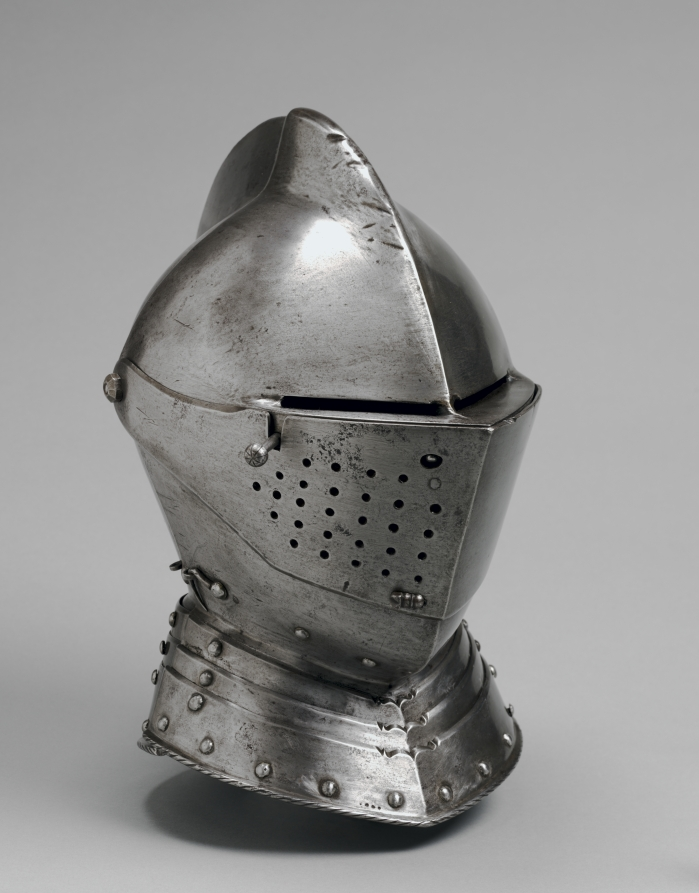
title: Helmet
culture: Germany, Saxony, 16th century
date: c. 1560–80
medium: steel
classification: Arms and Armor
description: This helmet was developed for the joust, a sporting combat of arms between two mounted contestants. This example shows the asymmetry of jousting armor. The participants rode along a wall-like barrier known as a "tilt" with their left sides facing. Consequently, armor on that side of the body tended to be thicker. The breath holes in the helmet were placed on the right side (farthest from an opponent's lance) to avoid injuries from splinters. The popularity of jousts and tournaments peaked around 1500 and required armor and other sporting equipment adapted for the endlessly varied games. By the reign of Emperor Maximilian I (1493–1519), there were at least 11 different forms of mounted jousts, exclusive of the numerous ceremonial combats on foot using such weapons as swords, halberds, pikes, and throwing axes. Each blow in the contest, especially favored in Germany, was carefully numbered and prescribed by rules.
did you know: Jousting contestants wore armor and charged at each other full speed on horseback, attempting to dismount the other with a lance. Such equipment protected contestants from injury, much like the helmet worn by football players today.